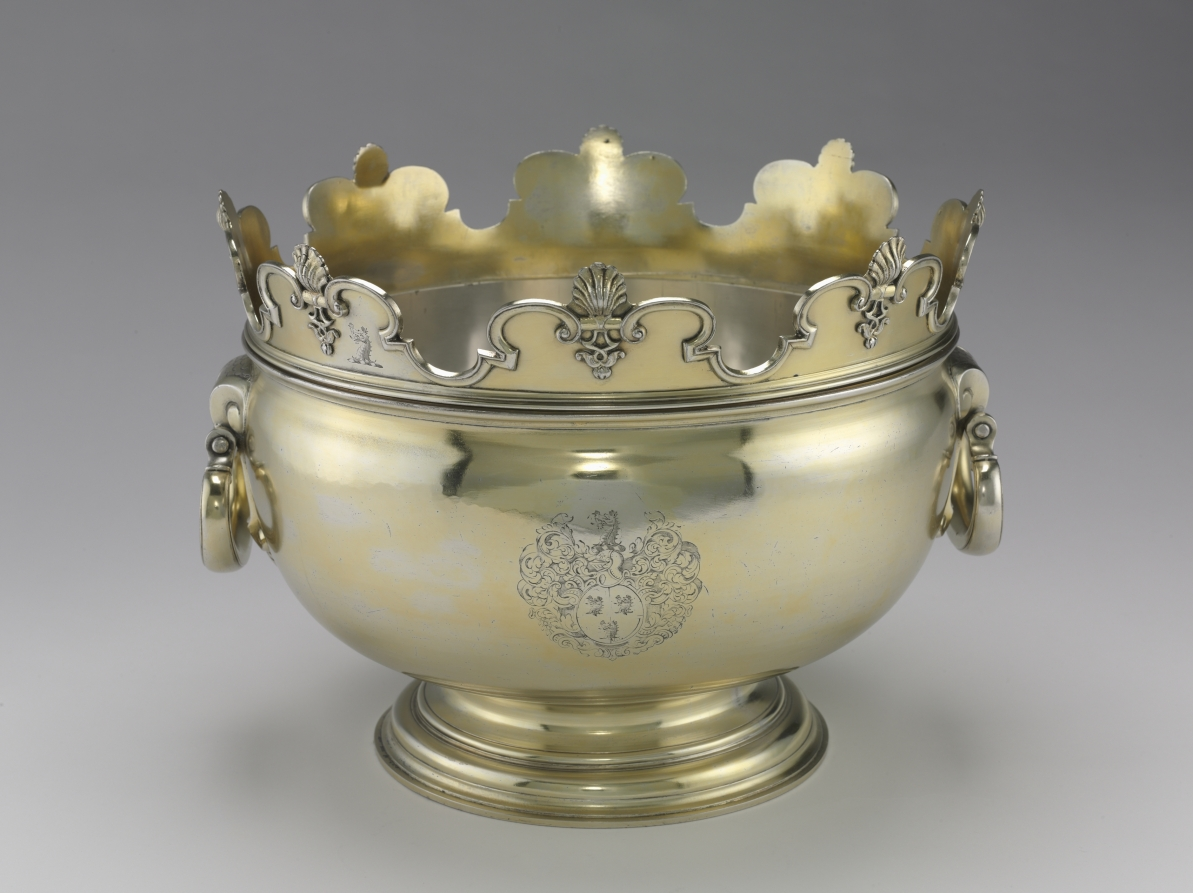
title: Monteith Bowl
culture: England, London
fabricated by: Benjamin Pyne (English, active 1693–1727)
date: 1715–16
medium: silver gilt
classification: Silver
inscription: engraved, center of bowl: arms, crest of Byam family (mantling and helmet were probably engraved at time bowl was made, crest and arms were altered to those of Byam at later date). Rim engraved with Byam Crest (also presumably not original).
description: This bowl’s notched rim allows for glasses to be suspended in water for cooling and cleansing between courses during a long dinner. The rim can be removed and the bowl used for punch as well. A year before Benjamin Pyne began this bowl, he was appointed Subordinate Goldsmith to the King in preparation for George I’s coronation (r. 1714–1727). Like much of his work, this Monteith bowl is characterized by its scale and simplicity.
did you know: The name Monteith is said to come from a mythical Scotsman named Monteigh, who wore cloaks with a similar notched pattern.